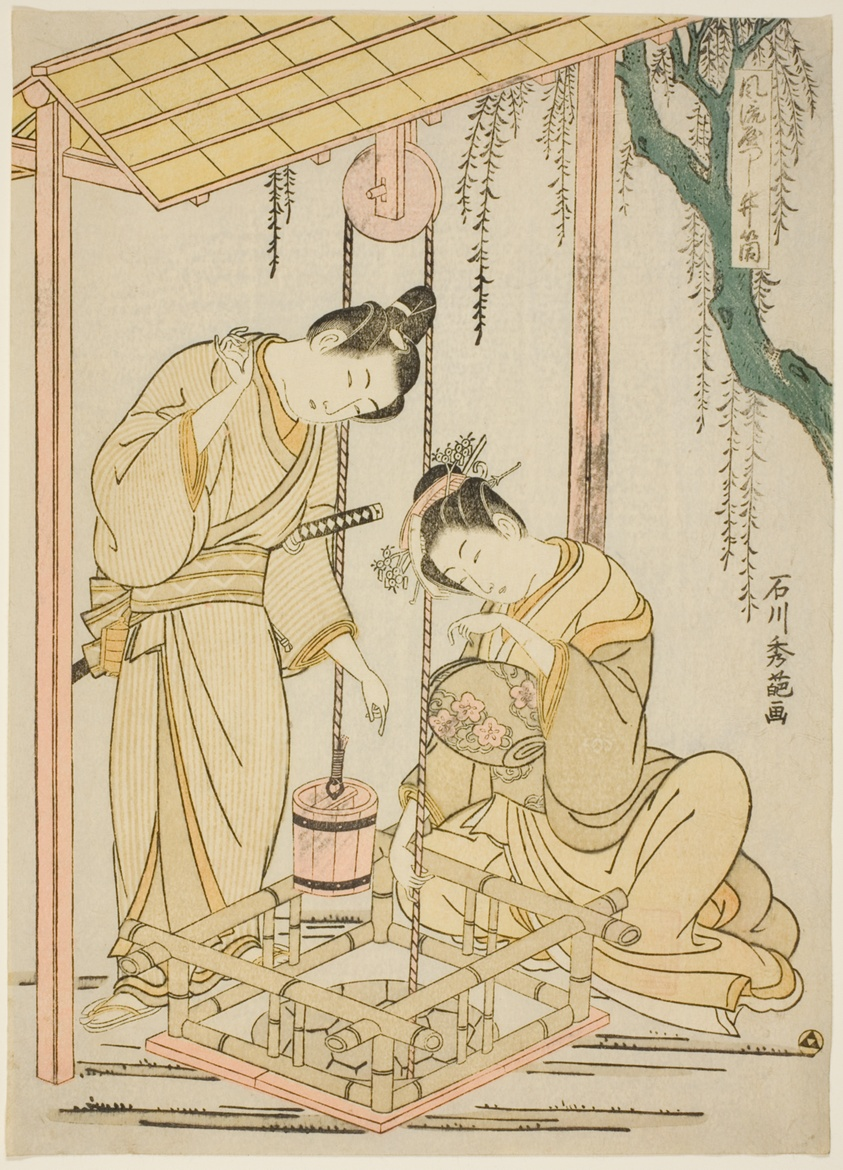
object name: Print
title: Modern parody of the well-curb episode from "Tales of Ise"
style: Japanese (culture or style)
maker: Ishikawa Toyonobu (Japanese, 1711-1785)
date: c. 1766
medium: Color woodblock print; koban, benizuri-e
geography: Japan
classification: woodblock print; print; asian art